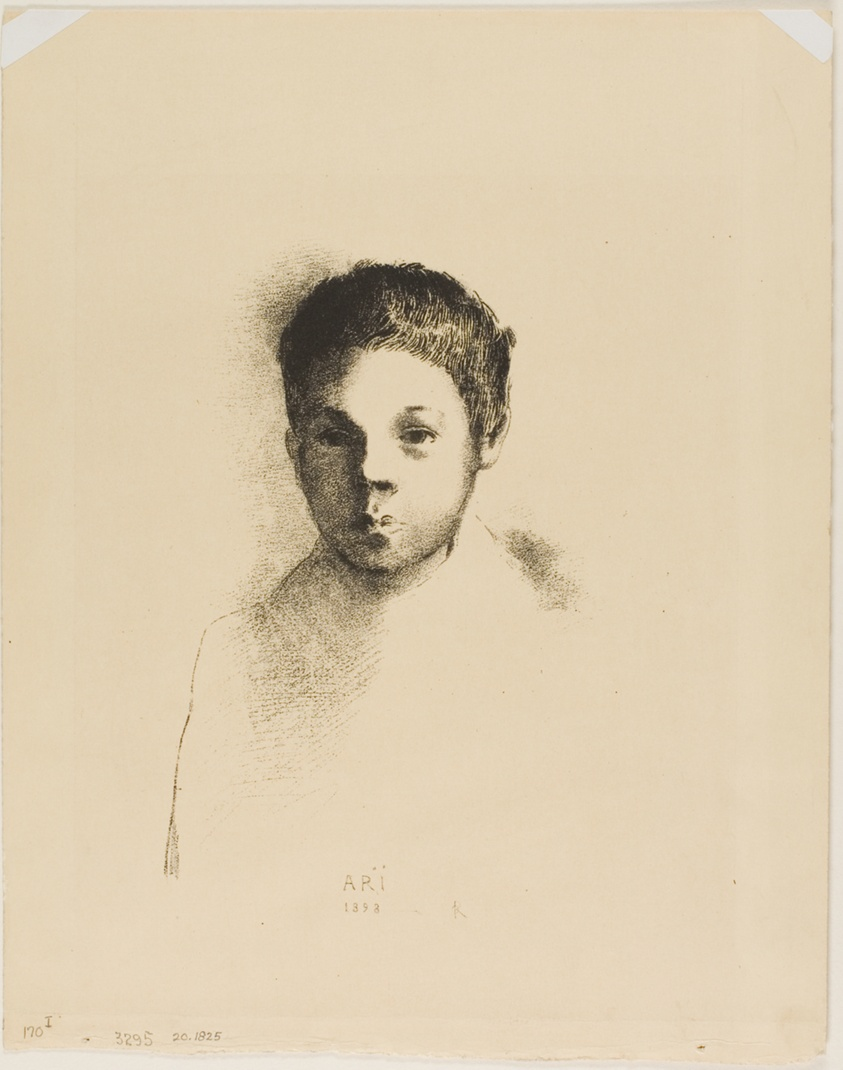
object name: Print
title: Arï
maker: Odilon Redon (French, 1840-1916)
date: 1898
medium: Lithograph in black on heavy cream wove paper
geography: France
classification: lithograph; print; prints and drawing; paper